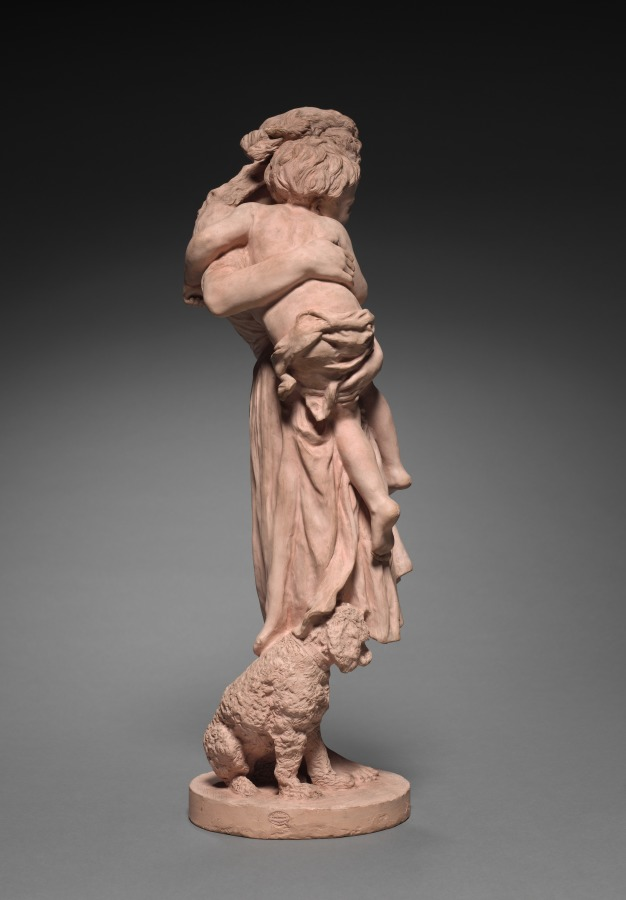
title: Brother and Sister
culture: France, 19th century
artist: Jean-Baptiste Carpeaux (French, 1827–1875)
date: 1875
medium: terracotta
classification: Sculpture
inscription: Signed "JBT" Carpeaux/1875" upper surface of base.